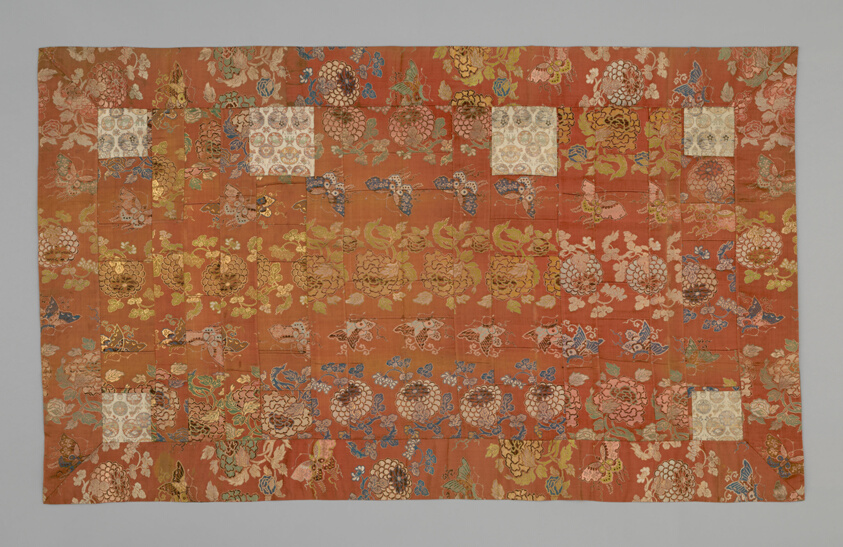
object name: Textile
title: Kesa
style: late edo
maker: Japan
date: late Edo period (1789–1868), 1800/68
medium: Hiri, yô, jô: silk and gold-leaf-over-lacquered-paper-strip, warp-float faced 2:1 ‘Z’ twill weave with 1:2 ‘Z’ twill interlacings of secondary binding warps and supplementary patterning wefts; shiten and niten: silk and gold-leaf-over-lacquered-paper-strip, warp-float faced 2:1 satin weave with weft-float faced 1:2 ‘Z’ twill interlacings of secondary binding warps and supplementary patterning wefts; lining: silk, plain weave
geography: Japan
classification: textile; liturgical - buddhist; weaving